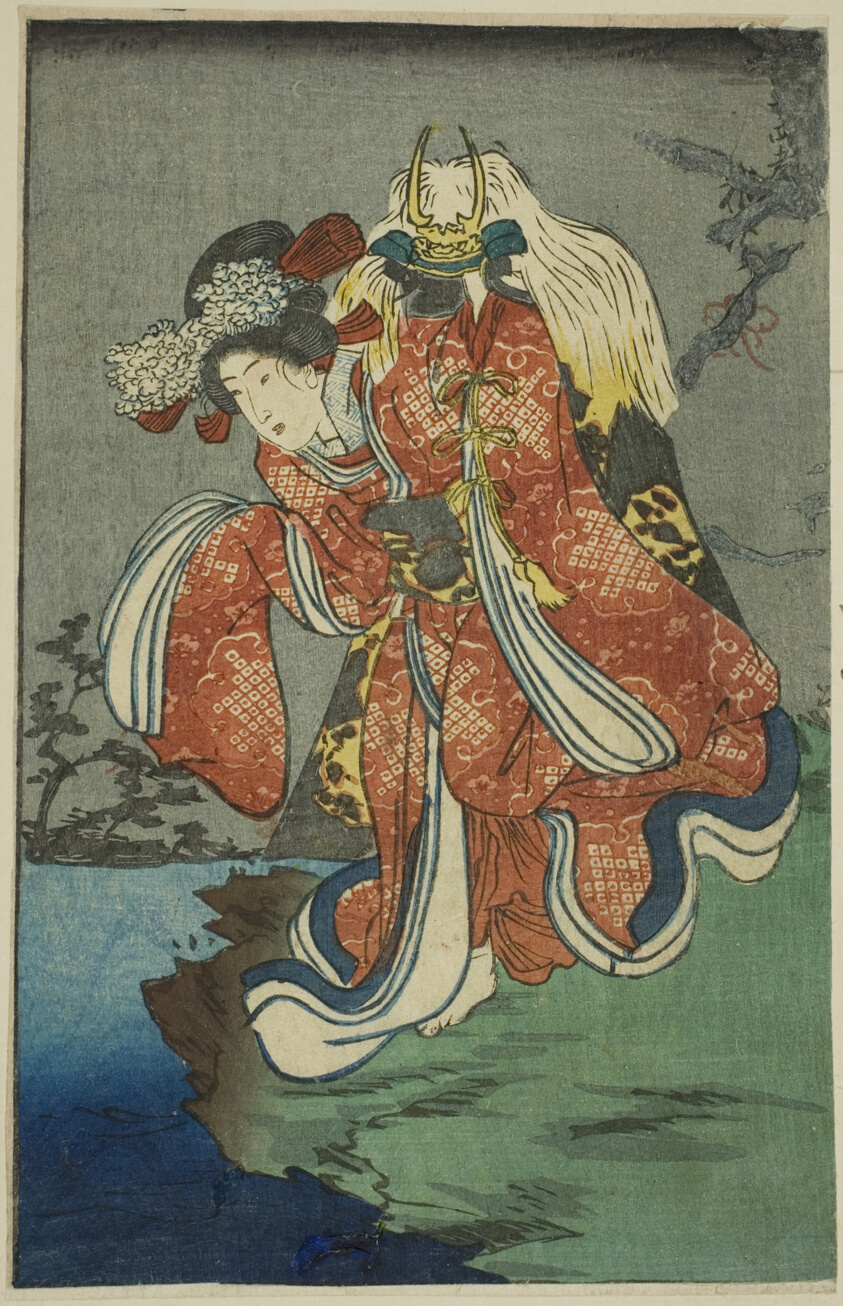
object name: Print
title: Shizuka Gozen, section of a sheet from the series "A Harimaze Mirror of Joruri Plays (Harimaze joruri kagami)"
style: Japanese (culture or style)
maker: Utagawa Kuniyoshi (Japanese, 1787-1861)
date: 1854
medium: Color woodblock print; section of harimaze sheet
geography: Japan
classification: woodblock print; print; asian art